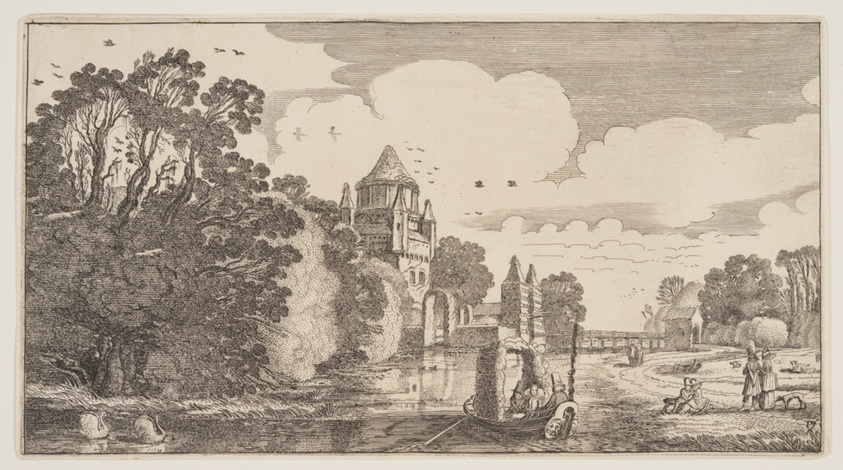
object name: Print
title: The ‘Kleine Houtpoort’ at Haarlem, from Landscapes (Playsante Lantschappen)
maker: Attributed to Claes Jansz. Visscher II (Dutch, 1586-1652); after Jan van de Velde II (Dutch, c. 1593-1641)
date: c. 1641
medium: Etching, with engraving, on ivory laid paper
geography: Netherlands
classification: etching; paper; print; prints and drawing